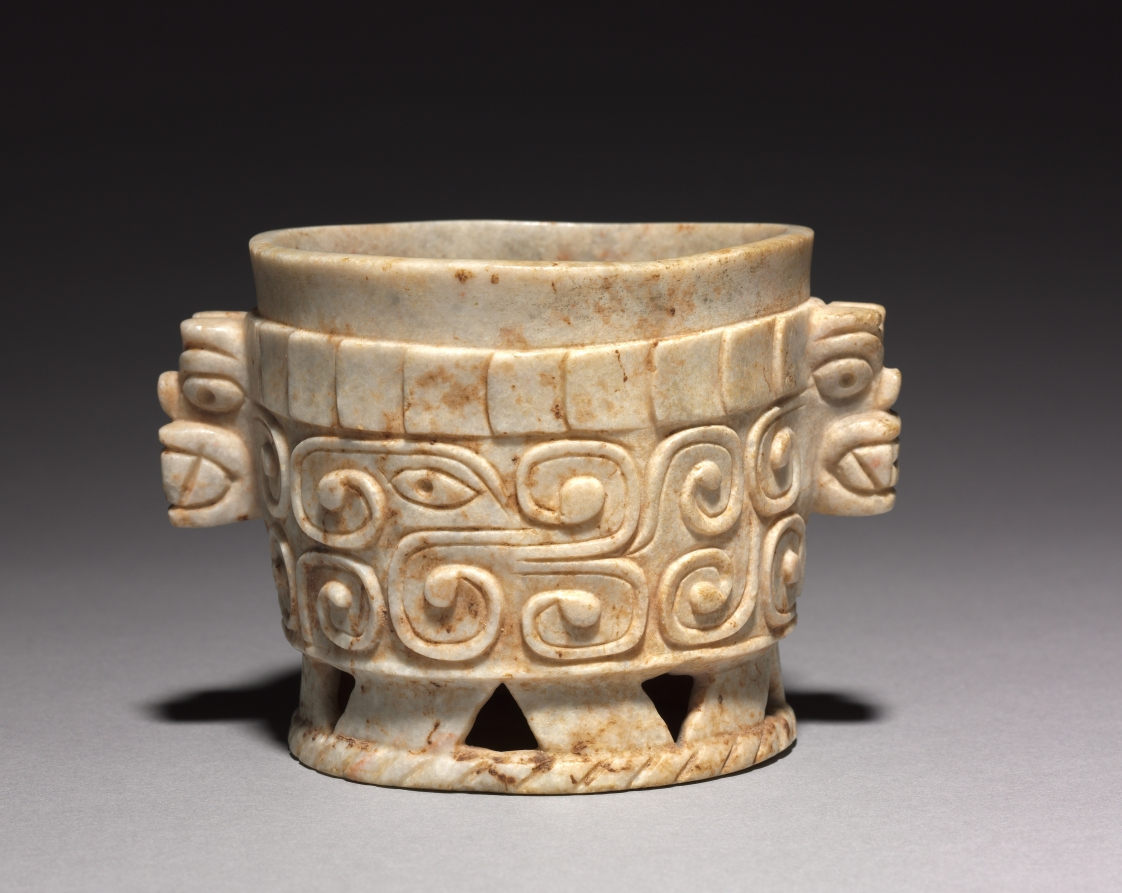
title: Ring-Base Vessel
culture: Honduras, Maya, Ulúa Valley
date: c. 600–1000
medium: marble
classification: Sculpture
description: The Ulúa region of Honduras, to the east of Maya territory, is best known for white marble vessels with walls ornamented in low relief and handles carved as animal heads, here bats but also felines, birds, monkeys, and others. This small example is distinguished by the crispness of its carved scrolls and the triangular cutouts of its pedestal base.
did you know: One of two vessels that were the first ancient American artworks collected by James and Florence Gruener.